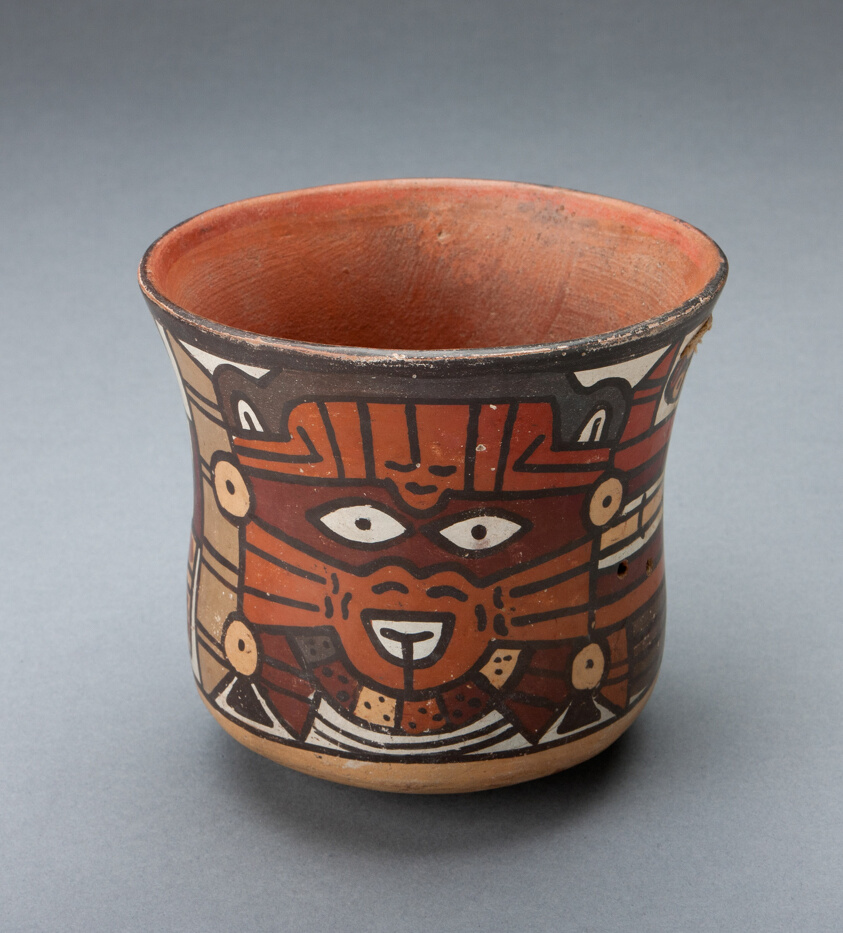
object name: Vessel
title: Cup Depicting a Ritual Perfomer Wearing a Feline Mask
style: nazca, early intermediate period, Pre-Columbian, americas, Arts of the Americas, andean, andes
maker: Nazca; South coast, Peru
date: 180 BCE–500 CE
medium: Ceramic and pigment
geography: Nazca Valley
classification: earthenware; art of the americas; ceramics; vessel